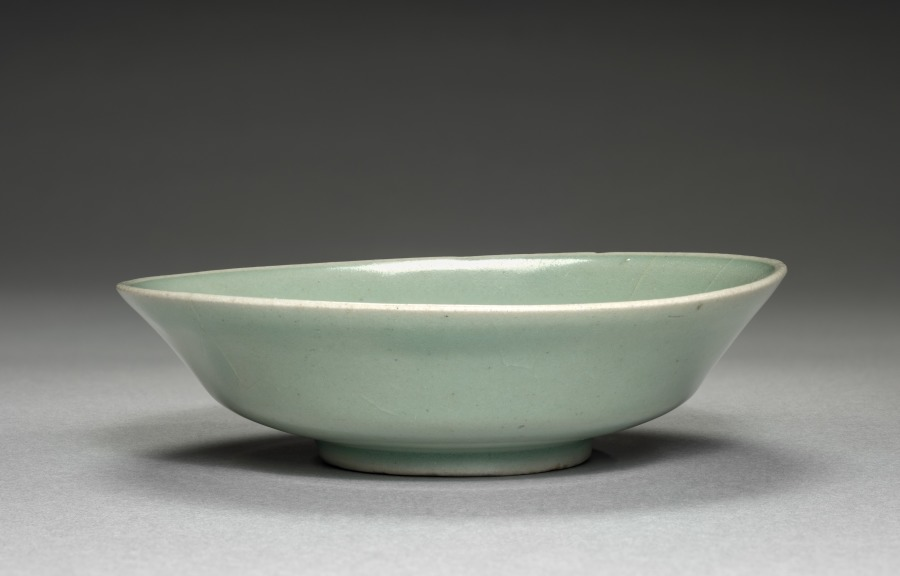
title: Dish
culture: Korea, Goryeo dynasty (918–1392)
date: 1100s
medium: glazed porcelain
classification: Ceramic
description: Celadon wares used for everyday such as this dish were among the most common burial objects in tombs during the Goryeo period (918–1392). Furnishing tombs with an elaborate assemblage of objects was believed to honor and comfort the newly dead. Generally, Goryeo tombs were left untouched until the late 1800s. During the colonial period (1910–45), however, Japanese archaeologists competitively excavated the tombs located in Kaeseong, the former capital of the Goryeo period, and soon became available for Japanese and Western collectors.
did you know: The pale bluish glaze indicates that this dish was created in the 1100s, when the production of celadon reached its technical peak.